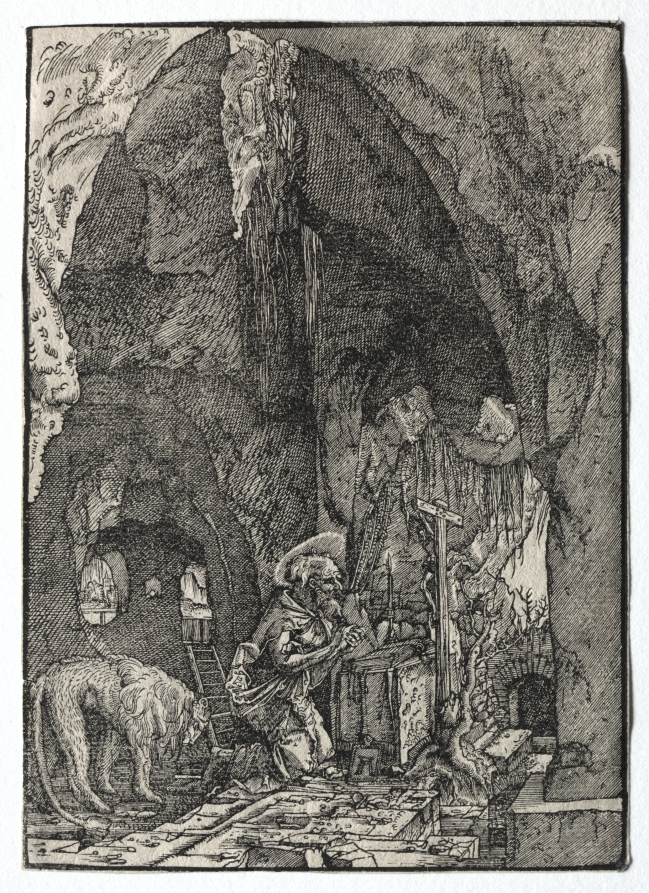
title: St. Jerome in the Cave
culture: Germany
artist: Albrecht Altdorfer (German, c. 1480–1538)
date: 1513–1515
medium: woodcut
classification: Print